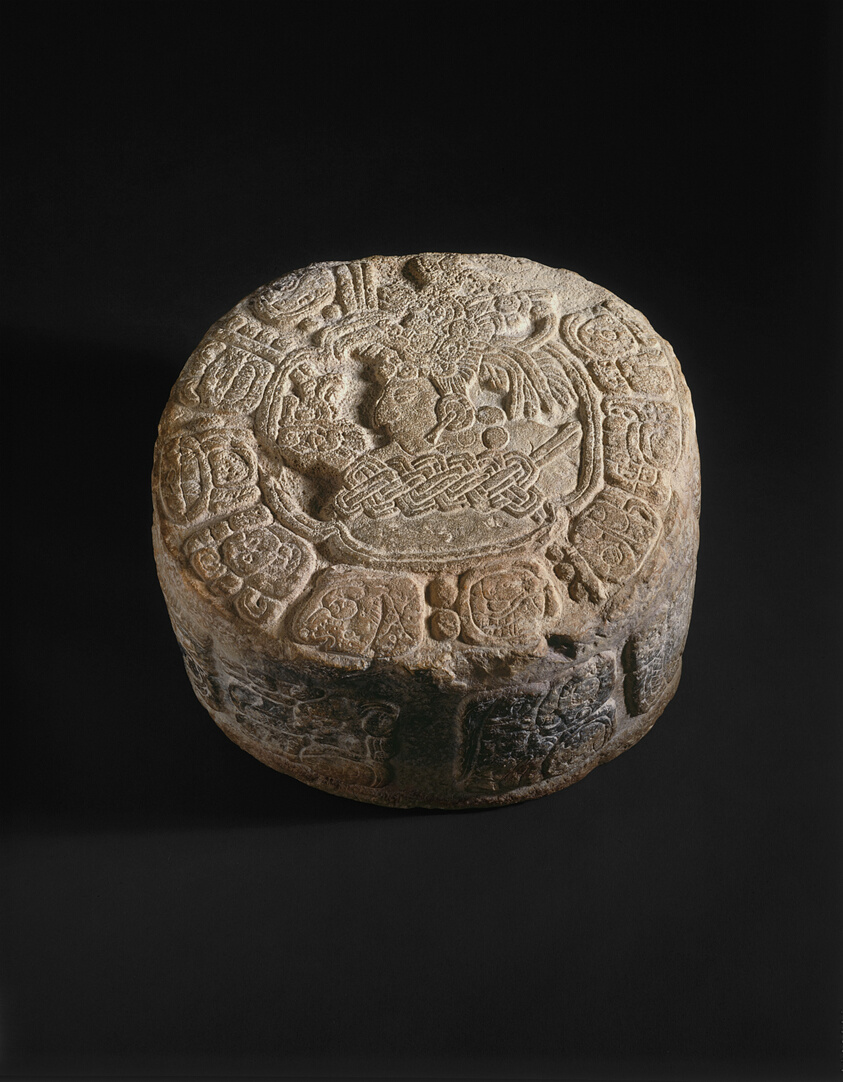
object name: Sculpture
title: Hieroglyphic Altar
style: maya, late classic, classic, mesoamerican, Pre-Columbian, americas, Arts of the Americas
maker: Late Classic Maya; Possibly Bonampak/Lacanha area, Mexico or Guatemala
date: 650–700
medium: Limestone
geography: Bonampak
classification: stone; altar; sculpture; art of the americas; carving; inscription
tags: ancestors, inscription, portraits, ritual, ritual objects, Hieroglyphs